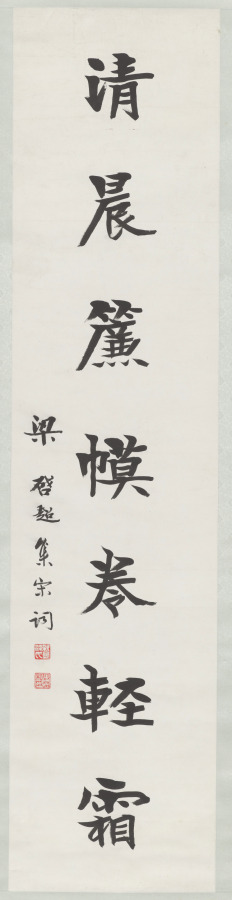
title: Left Scroll from Calligraphy Couplet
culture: China, Republican period (1912-49)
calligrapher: Liang Qichao (Chinese, 1873–1929)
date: after 1911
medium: One of a pair of hanging scrolls; ink on paper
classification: Calligraphy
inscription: 永夜鬧皆臥桂影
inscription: 旨徽仁兄雅心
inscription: 清晨簾幕卷輕霜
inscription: 梁啟超筆宋詞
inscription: [印] 新會梁氏. [印] 啓超和印.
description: The prominent politician and modern reformer Liang Qichao writes here in an angular, firm, and little modulated regular script style, inspired by inscriptions incised on ancient stone steles. Those script styles were popular among reformers of the time, as they sought to revive the ancient culture and built a new China on the country’s strong ancient foundations. Each scroll cites the verse of a historic cultural figure in Chinese history.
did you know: Liang Qichao aimed to reform the country and strengthen its foundations through the revival of the ancient culture of China.